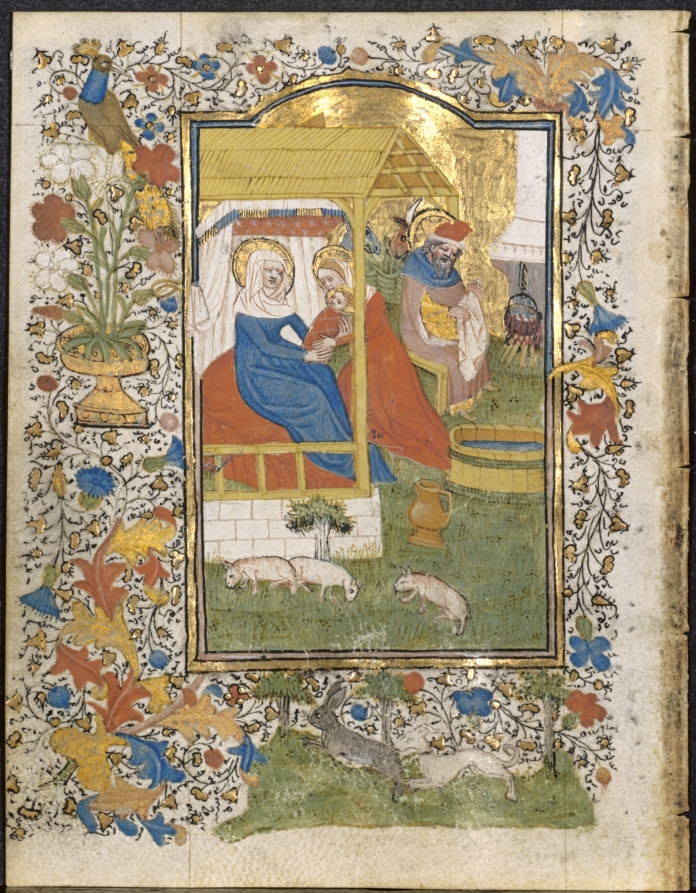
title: The Nativity: Leaf from a Book of Hours (3 of 6 Excised Leaves)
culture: France, Metz, 15th century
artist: Henri d'Orquevaulx (French)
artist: or Workshop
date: c. 1420–30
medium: ink, tempera, and gold on vellum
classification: Manuscript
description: This leaf survives from what must have been an extraordinarily rich book of hours. Stylistically, the illuminations relate to the workshop of Henri d'Orquevaulx, a documented Metz manuscript painter. Little is known about d'Orquevaulx's life or career. Compositionally, structurally, and stylistically, the miniatures suggest strong links to Netherlandish illumination.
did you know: The popularity of books of hours lasted until around the 1550s, when the German priest Martin Luther, in his attempts to reform the Catholic Church, declared them full of “un-Christian tomfoolery,” and they fell out of favor.